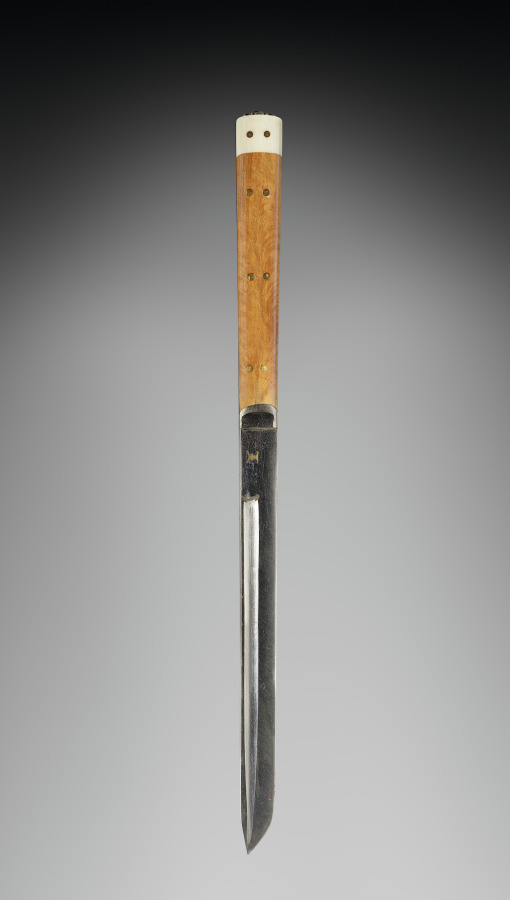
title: Knife for Kit with Chopsticks and Knife- Souvenir Trade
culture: Japan, Meiji period (1868–1912) to Taishō period (1912–26)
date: early 1900s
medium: enamel, wood, walrus ivory or bone, metal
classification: Implements